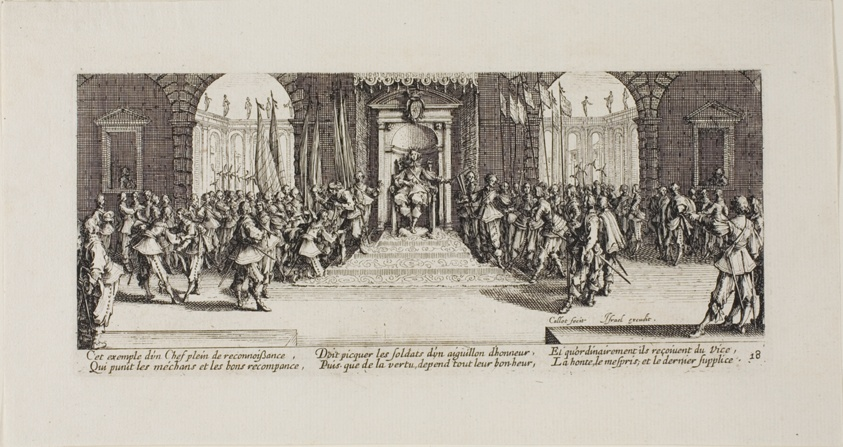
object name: Print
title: Distribution of Rewards, plate eighteen from The Miseries of War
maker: Jacques Callot (French, 1592-1635); published by Israël Henriet (French, 1590-1661)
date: 1633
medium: Etching on paper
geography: France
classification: etching; print; prints and drawing